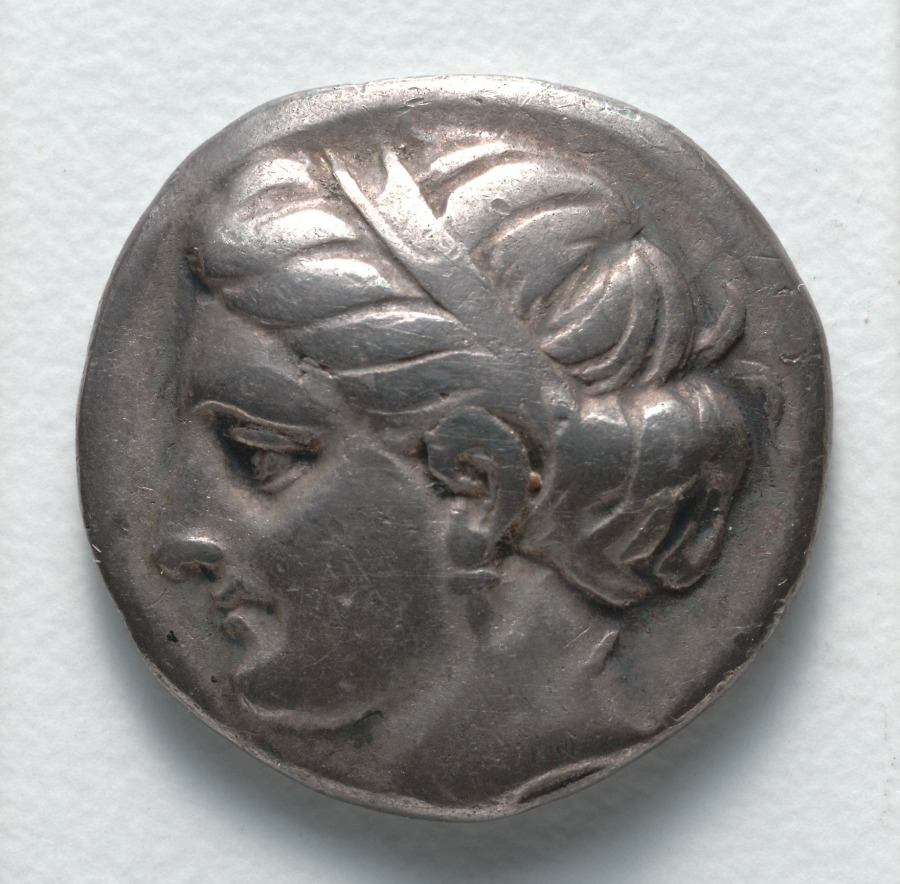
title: Drachm: Female Head (obverse); Eagle (reverse)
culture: Greek, minted at Chalkis (Euboia)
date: 337–308 BCE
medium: silver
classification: Coins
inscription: ΧΑΛ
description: Minted after a period of Athenian domination, this coin from Chalkis features two traditional symbols of its home island Euboia: a female head and an eagle battling a snake. What distinguishes this issue from earlier types, however, are the smooth, rounded face and deep-set eyes of the woman on the obverse, who may represent the goddess Euboia herself.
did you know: On the reverse is Chalkis’s 3-letter abbreviation ΧΑΛ (CHAL).